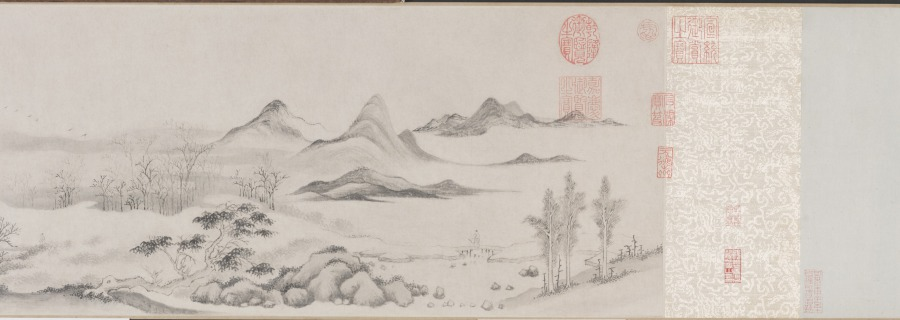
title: Water Village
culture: China, Ming dynasty (1368–1644)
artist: Wen Boren (Chinese, 1502–1575)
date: 1570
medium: handscroll; ink and light color on paper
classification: Painting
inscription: 隆慶庚午秋仿趙文敏筆. 五峰文伯仁 [印] 五峰山人; 文伯仁印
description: In the autumn of 1570, Wen Boren painted this seemingly unemotional scene of low-lying marshlands with a chain of rounded mountains in the background. A fishing boat is nestled on the shore near the village. Although paths and bridges traverse the landscape, only two people are visible in the stillness. From the restrained atmosphere of this landscape, one would never guess that Wen Boren was known as the “bad boy” of the Wu School for his explosive temper. As a younger man, he was even embroiled in a contentious lawsuit with his own uncle, Wen Zhengming (1470–1559), a master of Ming dynasty painting with whom he had trained. The ideal of the scholar-painter, or literati, was that an artist’s moral character is reflected in his paintings, so there was great incongruity between Wen Boren’s difficult personality and his restrained landscapes. A contemporary, Wang Shizhen, wrote this about him: "This gentleman is prone to behave odiously and screamed accusations at people. How is it possible for him to carry in his bosom such a wealth of scenic wonders?" Who knows what effort it took to subdue his fractious spirit to project an image of coolness and refined taste in his paintings?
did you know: A foreground tree has an eccentric twisting silhouette and pepper-dot "halo" of leaves.